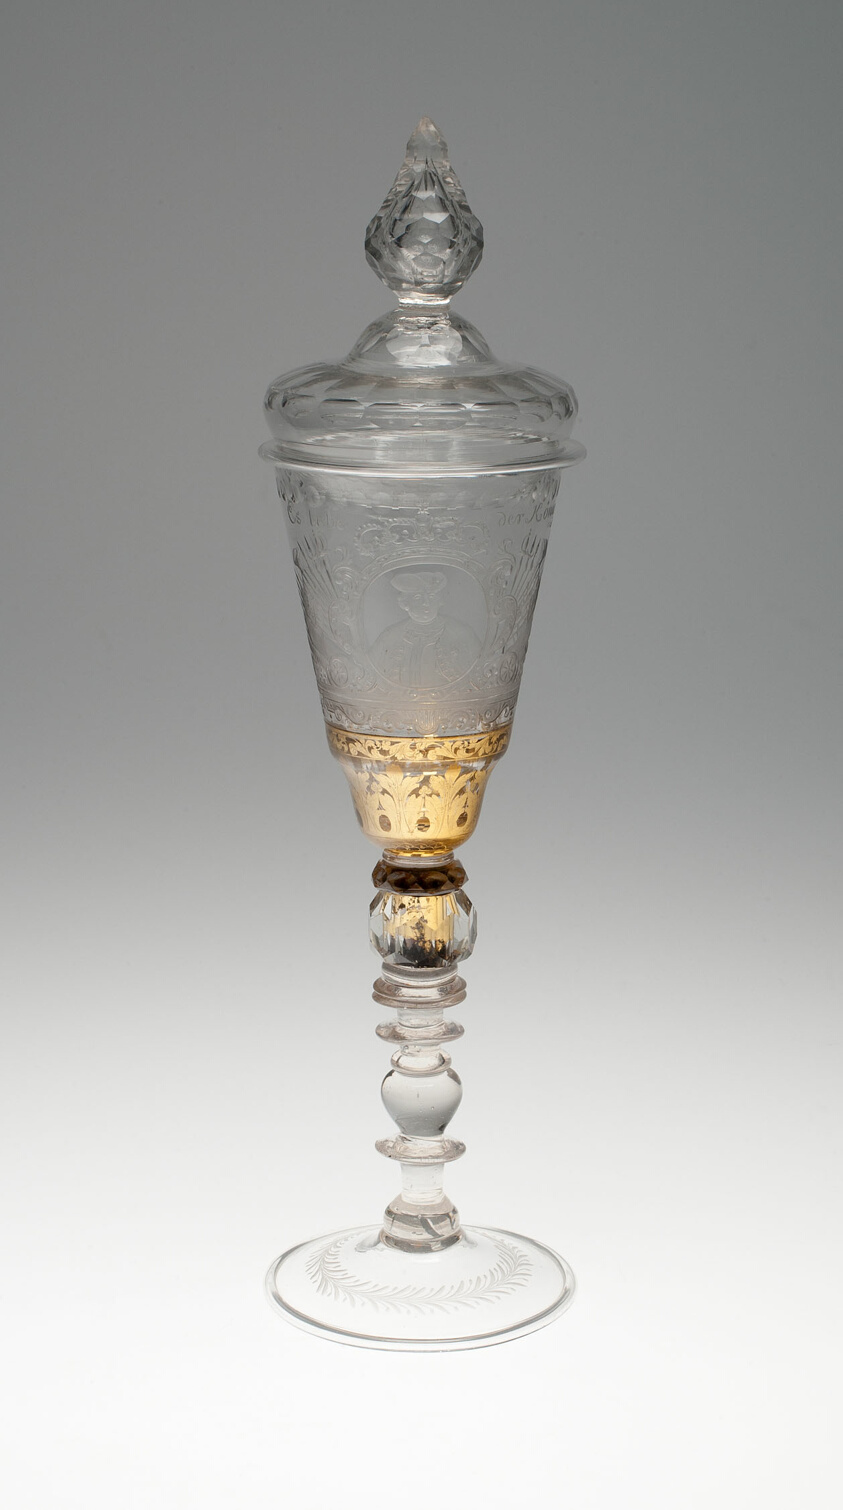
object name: Glass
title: Wine Glass and Cover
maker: Bohemia, Czech Republic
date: Early 18th century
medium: Glass with engraved gold leaf decoration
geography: Bohemia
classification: drinking vessel; glass; european decorative arts